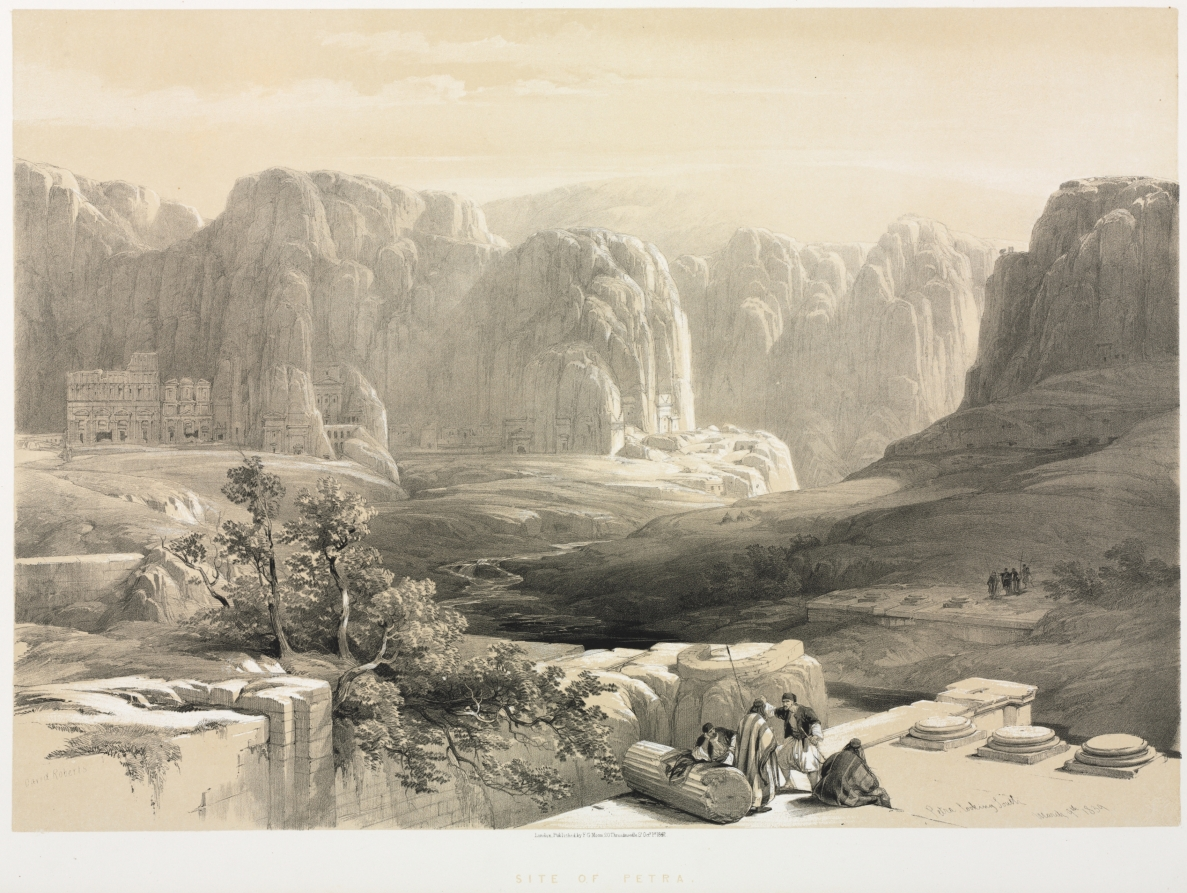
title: The Holy Land, Syria, Idumea, Arabia, Egypt & Nubia (Vol. III): Petra, Looking South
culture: England, 19th century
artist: Louis Haghe (British, 1806–1885)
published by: F. G. Moon (British, 1797–1871)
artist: after David Roberts (Scottish, 1796–1864)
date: 1842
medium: lithograph with black and beige tint stone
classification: Print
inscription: lower right in pencil: "Petra looking South March 9th 1839"